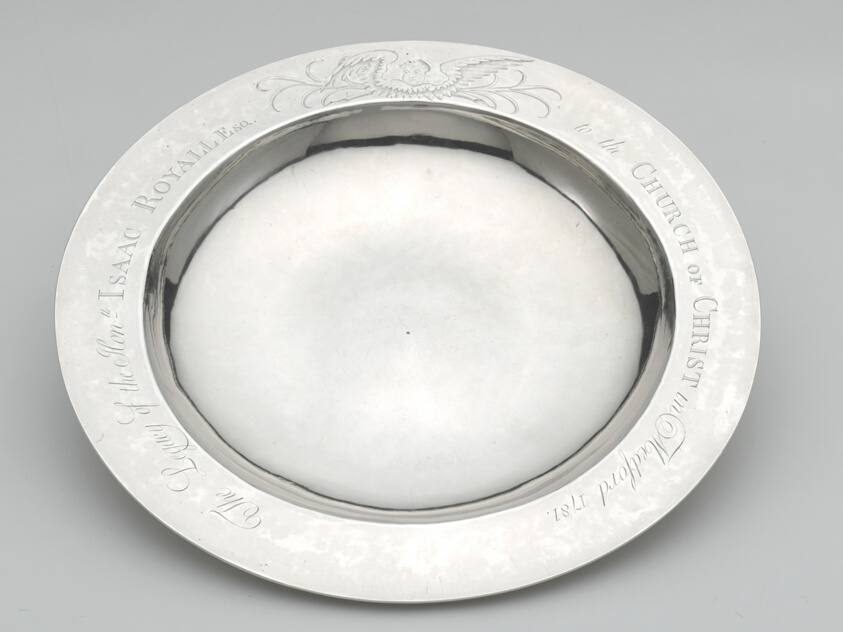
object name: Metalwork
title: Communion Dish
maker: Benjamin Burt (American, 1729–1805); Boston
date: 1781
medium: Silver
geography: Boston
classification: dish (vessel); silver; american decorative arts; american arts; decorative arts